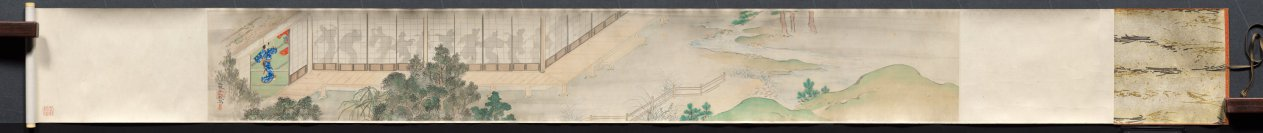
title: The Shadow Dancers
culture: Japan, Edo period (1615–1868)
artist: Yamamoto Baiitsu (Japanese, 1783–1856)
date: 1800s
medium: handscroll, ink and color on silk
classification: Painting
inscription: artist's signature and two seals at end of painting.